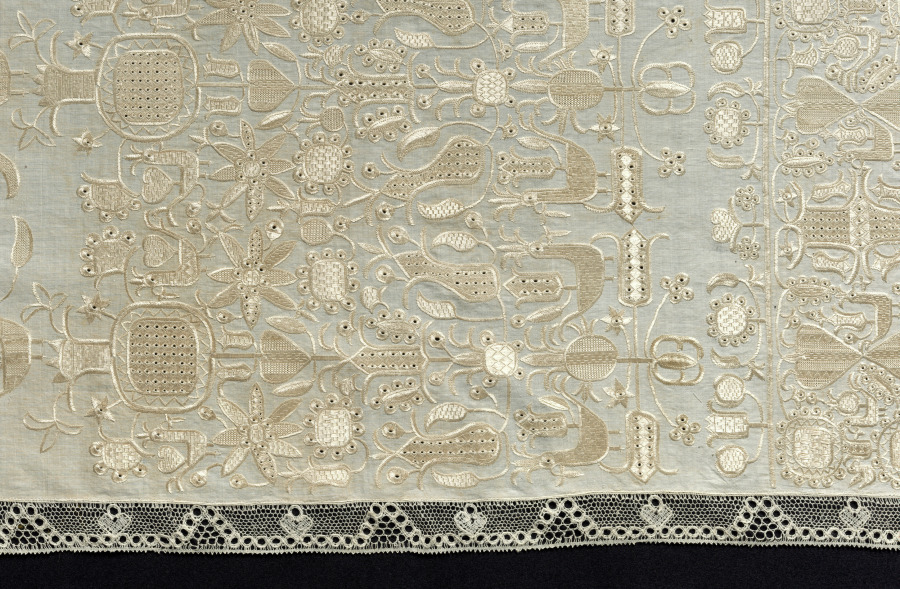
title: Lace Shawl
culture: Czechoslovakia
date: 1800s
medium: Linen: plain weave with bobbin lace and silk embroidery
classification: Embroidery